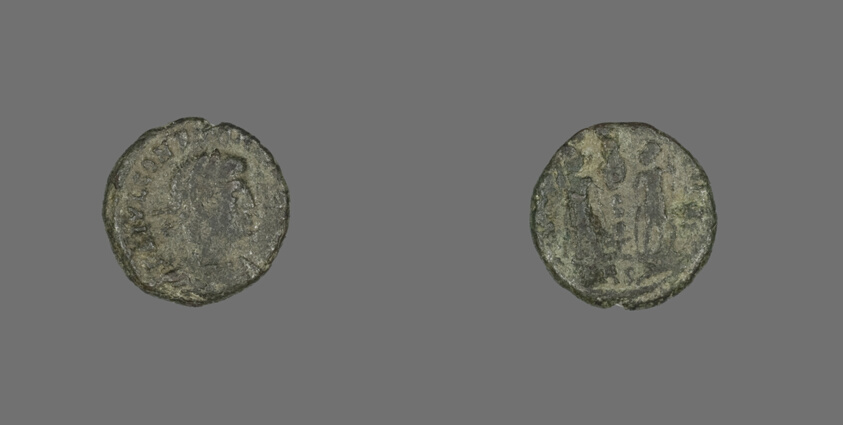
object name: Coin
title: Coin Portraying Emperor Constans or Emperor Constantius II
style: roman (ancient, style or period), ancient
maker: Roman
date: 324-361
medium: Bronze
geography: Roman Empire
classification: coin; ancient art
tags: portrait